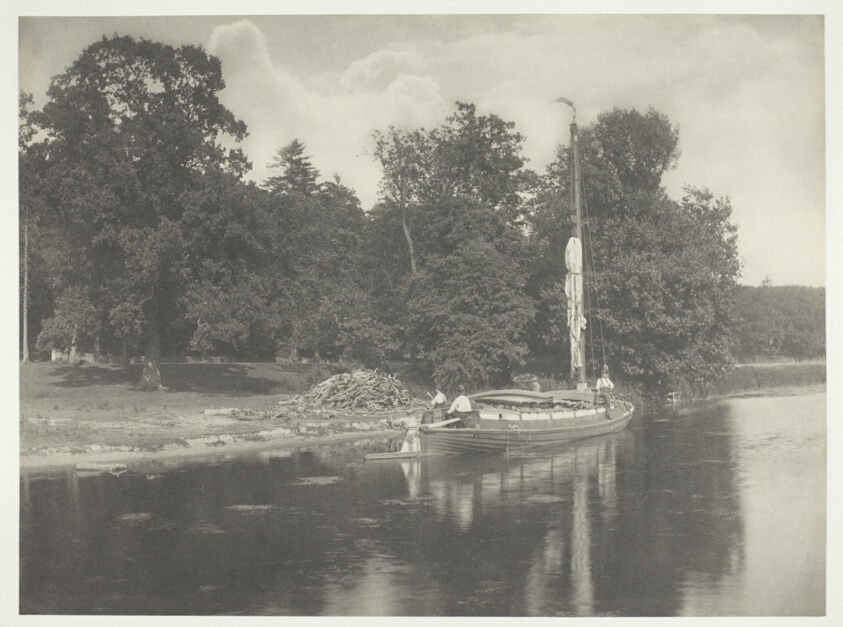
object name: Photograph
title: The River Bure at Coltishall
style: 19th century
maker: Peter Henry Emerson (English, born Cuba, 1856–1936)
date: 1886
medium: Platinum print, pl. XXIII from the album "Life and Landscape on the Norfolk Broads" (1886)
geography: England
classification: platinum print; photographic process; photography; photograph